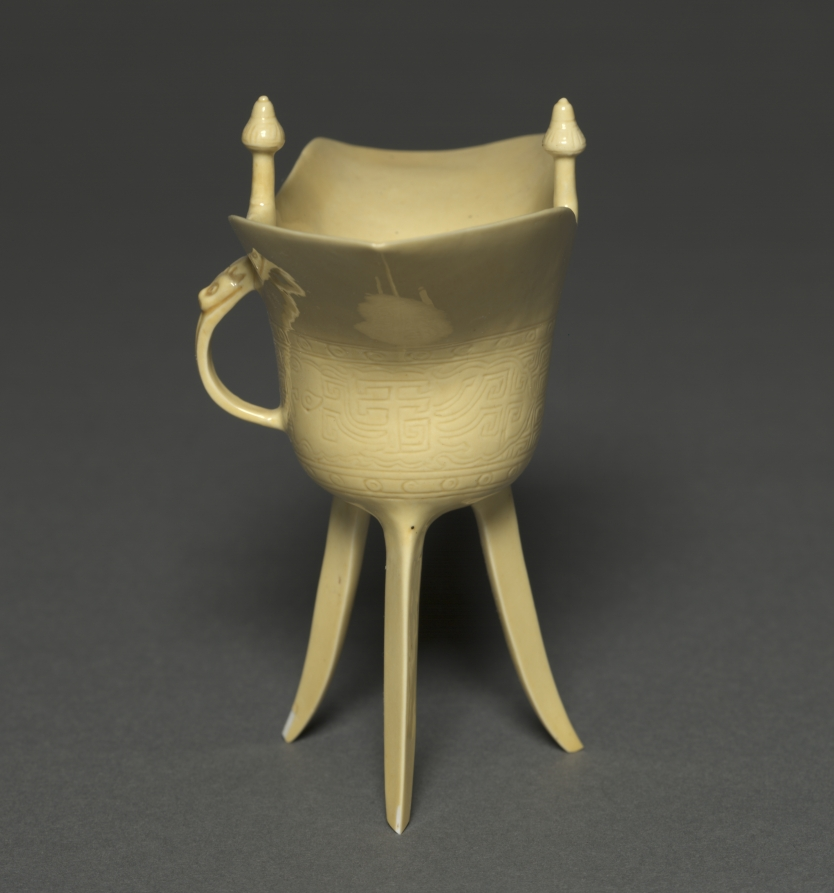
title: Libation Cup in the Form of a Jue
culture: China, Jiangxi province, Jingdezhen, Qing dynasty (1644-1911), Kangxi period (1662-1722)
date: 1662–1722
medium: porcelain with incised and applied decoration and yellow glaze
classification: Ceramic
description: A jue is an ancient Chinese vessel originally designed for serving wine during ceremonies. Bronze jue became prominent during the Shang (c. 1500–1050 BCE) and Zhou (1050–221 BCE) dynasties. This particular piece, made of porcelain during the Qing dynasty (1644–1911), emulates the earlier bronze designs. It reflects the owner's taste for antiquity.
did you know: The handle is decorated with a dragon mask, while the body has a fret pattern in the incised underglaze.